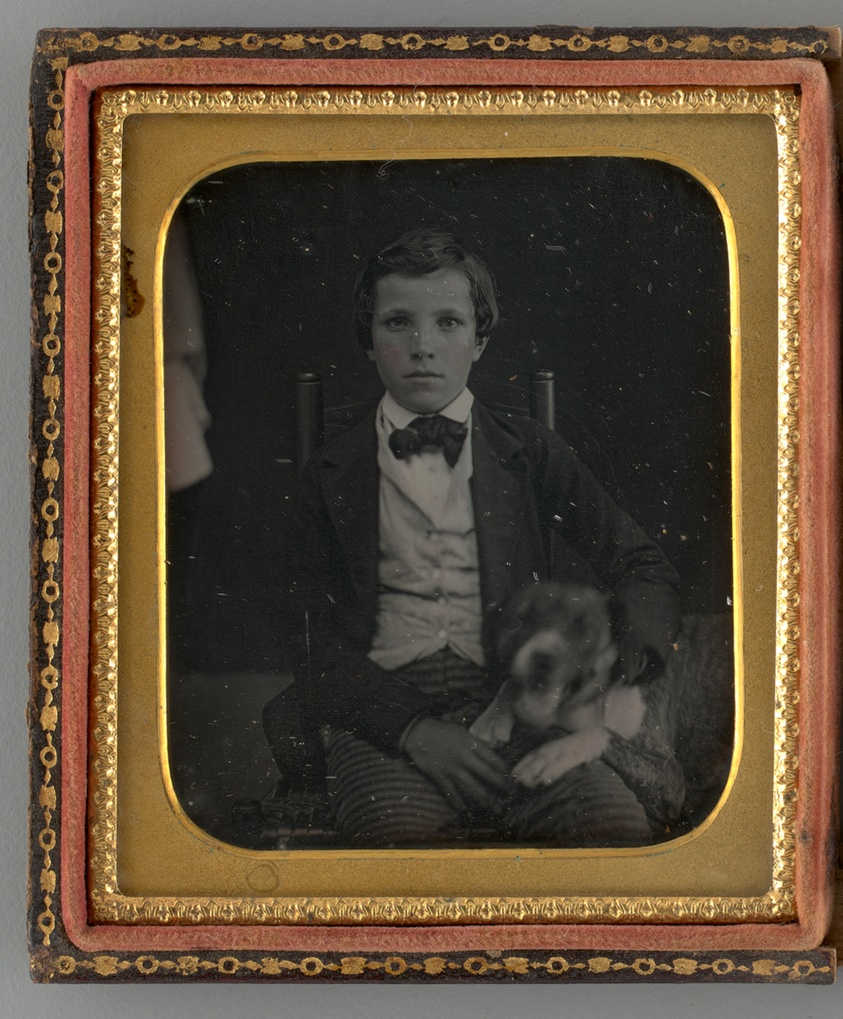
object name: Photograph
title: Untitled (Portrait of a Seated Boy with a Dog)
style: 19th century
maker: Unknown maker; American, 19th century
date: 1859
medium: Daguerreotype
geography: United States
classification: portrait; photograph; photographic process; photography; portrait; daguerreotype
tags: lundberg collection, portraits: male subject, boys, children, dogs, animals, portraits, portraits: child subject